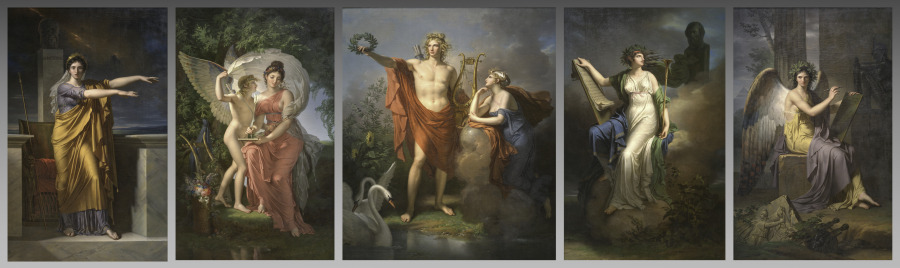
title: Polyhymnia, Muse of Eloquence; Erato, Muse of Lyrical Poetry; Apollo, God of Light, Eloquence, Poetry and the Fine Arts with Urania, Muse of Astronomy; Calliope, Muse of Epic Poetry; Clio, Muse of History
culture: France, late 18th-early 19th century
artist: Charles Meynier (French, 1768–1832)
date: 1800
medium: oil on canvas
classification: Painting